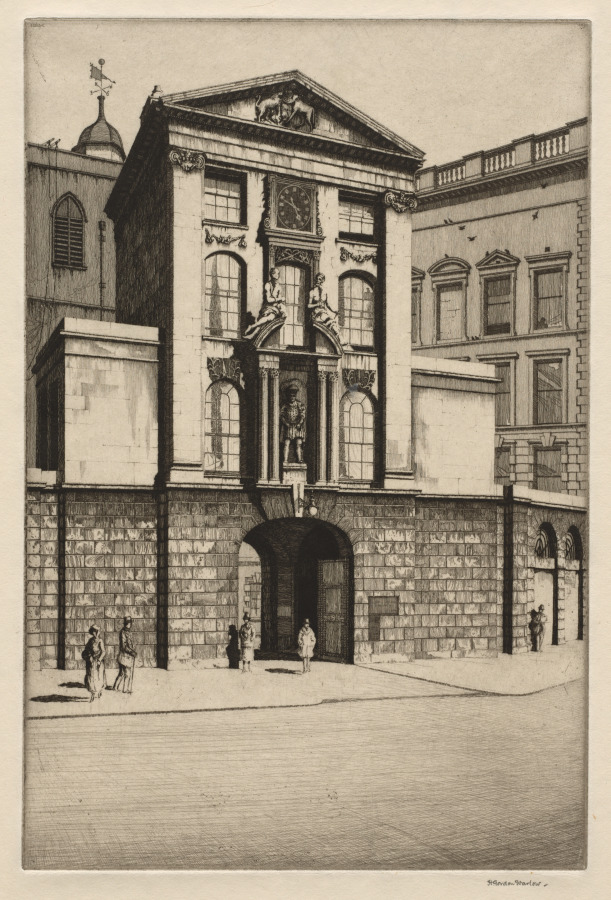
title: Henry VIII Gateway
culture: England, 20th century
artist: Herbert Gordon Warlow (British, 1885–1942)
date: c. 1930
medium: etching and drypoint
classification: Print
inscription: Lower right, in ink: H. Gordon Warlow; lower right corner, in graphite: Henry VIII Gateway